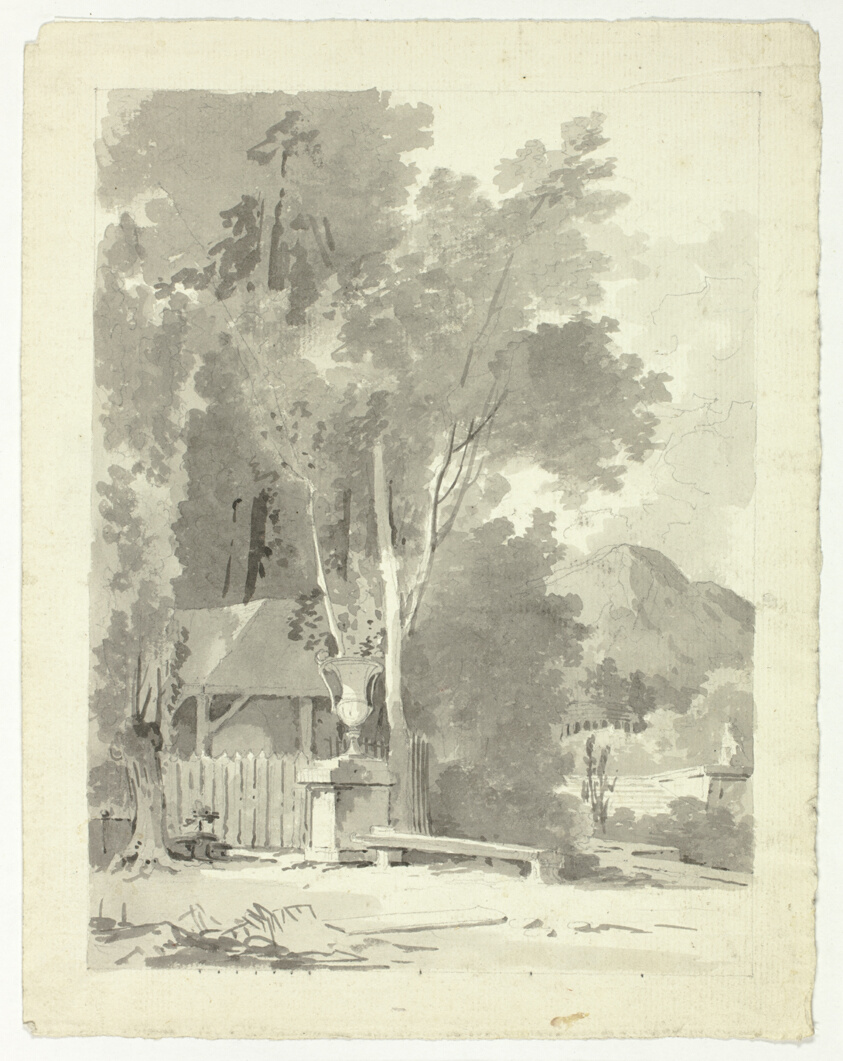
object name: Drawing and Watercolor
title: Classical Urn in Front of a Shed, with Temple and Mountain in Background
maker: Pierre Antoine Mongin (French, 1761/62-1824/27)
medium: Brush and gray wash, with graphite, on cream laid paper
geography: France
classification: ink or chalk wash; drawings (visual works); prints and drawing